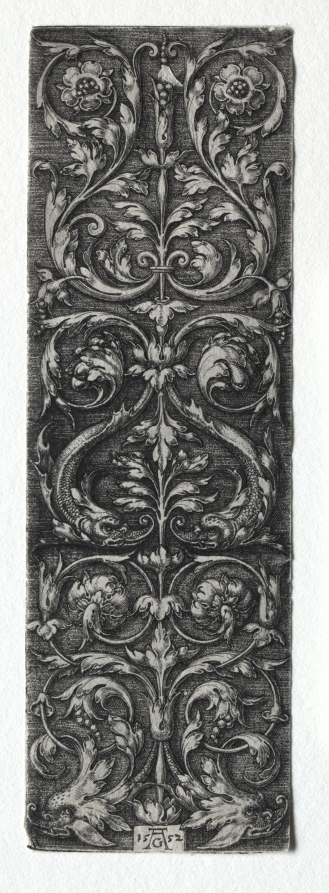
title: Ornament Design with Fishes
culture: Germany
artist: Heinrich Aldegrever (German, 1502–1555/61)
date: 1552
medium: engraving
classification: Print